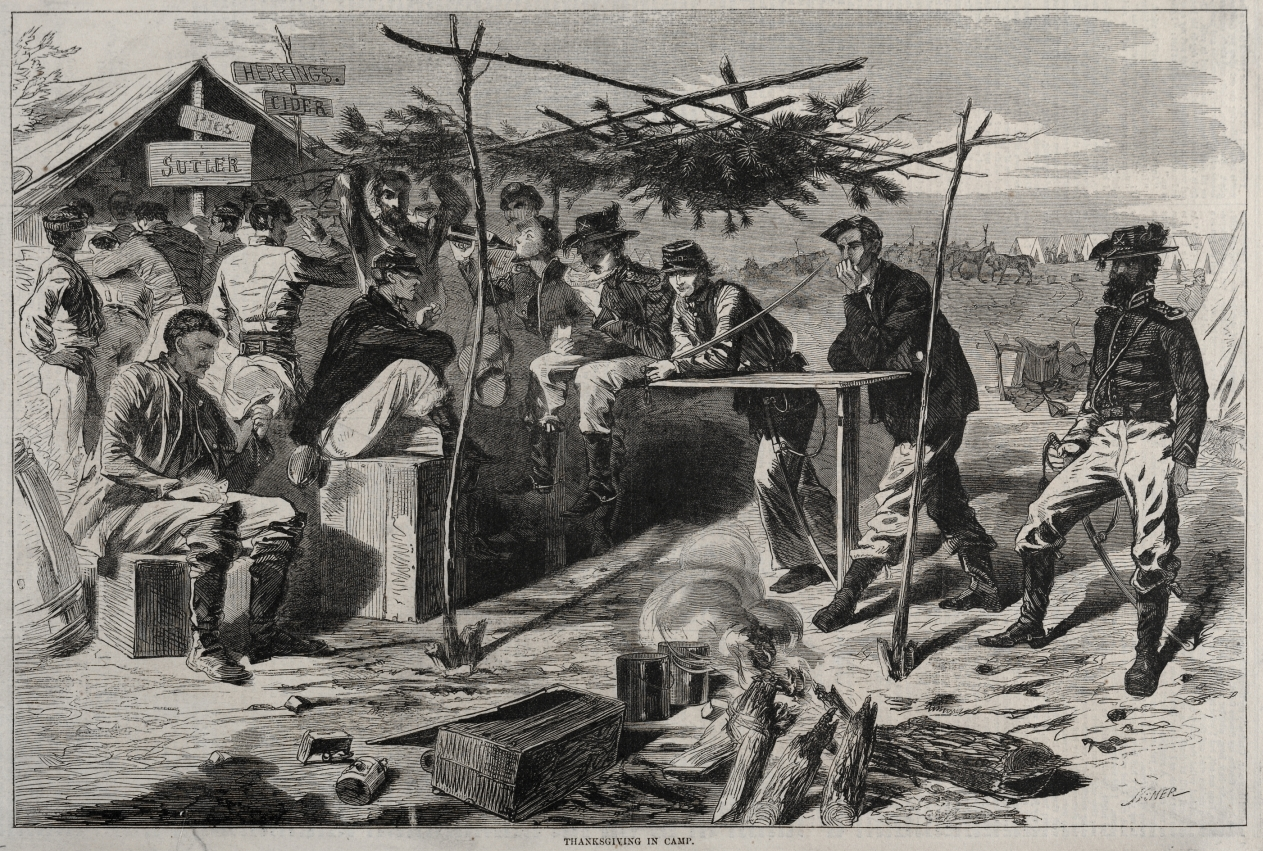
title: Thanksgiving in Camp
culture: America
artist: Winslow Homer (American, 1836–1910)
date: 1862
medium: wood engraving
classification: Print